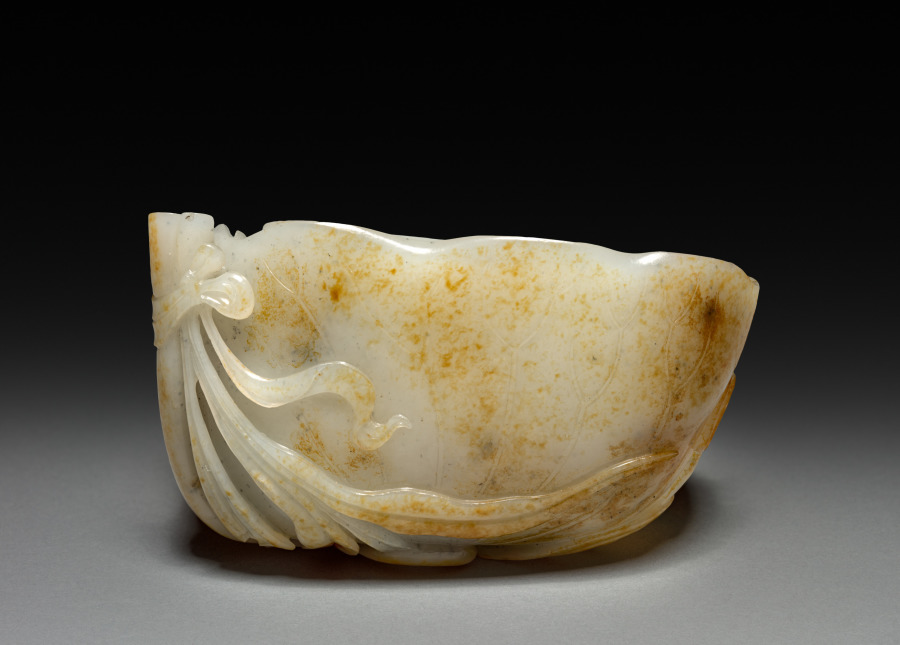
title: Cup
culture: China, Qing dynasty (1644-1911), Kangxi reign (1662-1722)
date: 1662–1722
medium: jade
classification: Jade